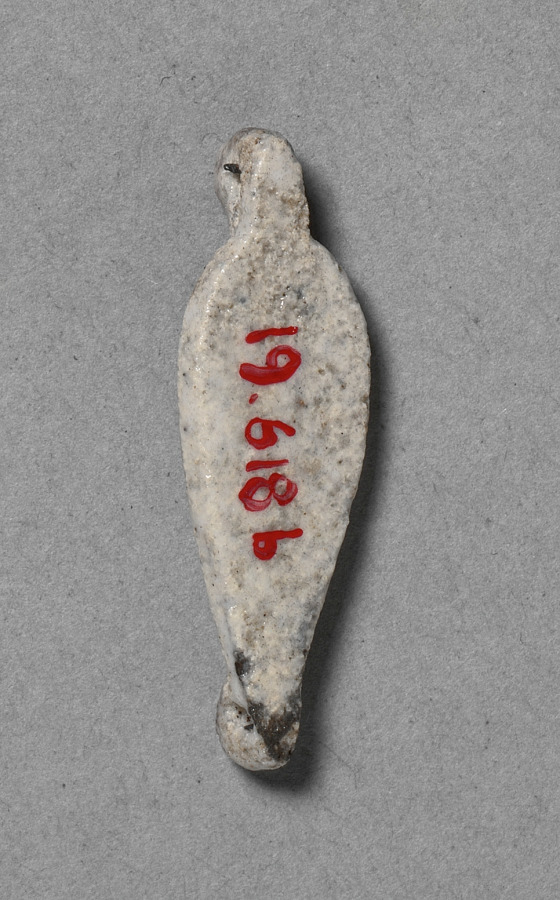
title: Petal-Shaped Bead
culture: Egypt, New Kingdom (1540–1069 BCE), Dynasty 18, reign of Amenhotep III (1390–1352 BCE)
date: c. 1391–1353 BCE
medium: faience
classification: Jewelry